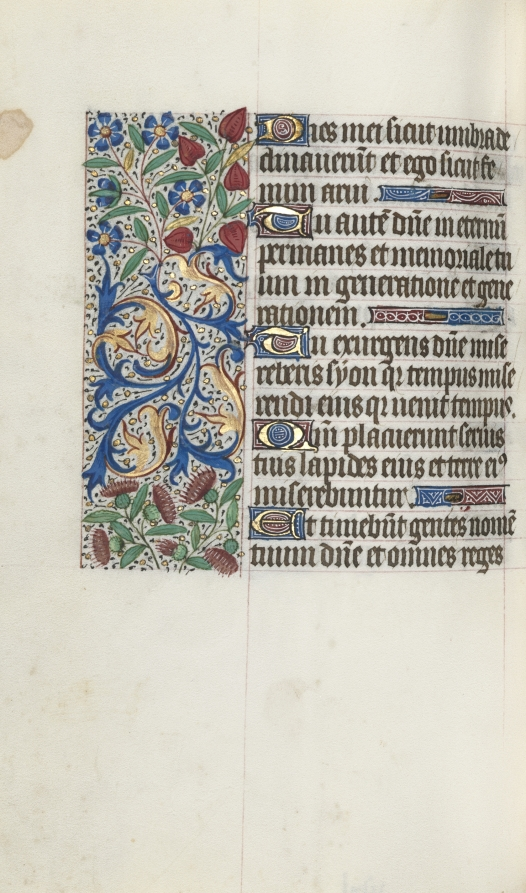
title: Book of Hours (Use of Rouen): fol. 88v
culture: France, Rouen, 15th century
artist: Master of the Geneva Latini (French, active Rouen, 1460–80)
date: c. 1470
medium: ink, tempera, and gold on vellum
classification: Bound Volume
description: In the late 1400s and early 1500s Rouen was an established and important center of book production. The city’s cathedral had a wealthy chapter that spent large sums of money to commission books and to maintain its extensive library. The stationers and booksellers would have likely been concentrated in or near the cathedral precinct. This artist, named after a manuscript now in Geneva, was Rouen’s principal illuminator during the second half of the 1400s.